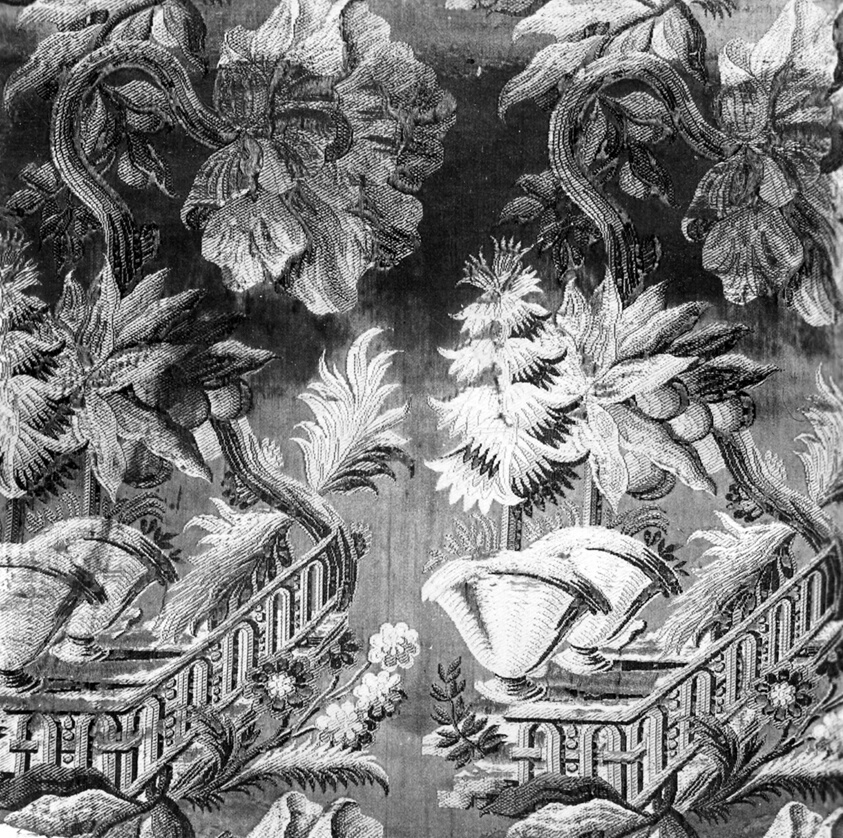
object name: Textile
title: Fragment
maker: France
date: c. 1732/33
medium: Silk, warp-float faced 7:1 satin weave with supplementary brocading wefts and supplementary binding warps tying some self-patterning ground wefts in plain interlacing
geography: France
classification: textile; weaving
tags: Floating Gardens